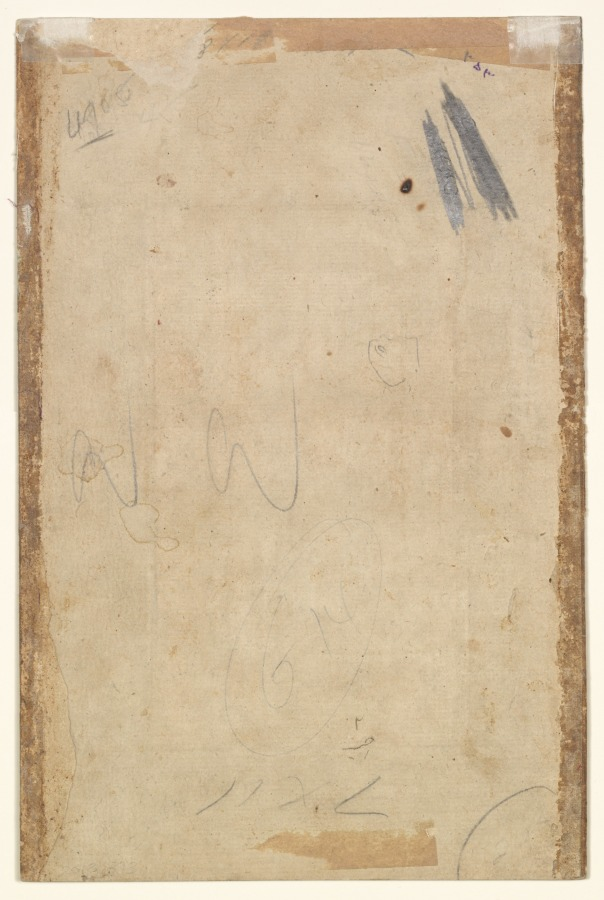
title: Portrait of Suraj Singh Rathor, Raja of Marwar and Maternal Uncle of Shah Jahan: A Page from the Prince Khurram Album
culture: India, Mughal court, early 17th century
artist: attributed to Bishandas (Indian, active c. 1610–30)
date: c. 1600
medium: Gum tempera and gold on paper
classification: Painting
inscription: inscribed in hand of Shah Jahan in lower inner border: shabihi Raja Suraj-Singh Rathor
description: This true-to-life portrait depicts the maternal uncle of the Mughal prince Khurram (1592-1658), who would later become the emperor Shah Jahan. His clothing and accessories-especially the six-pointed wrapped tunic made of prized translucent muslin-reveal his wealth and status. The artist’s skillful brushwork conveys the varied textures of the fabrics and sensitively renders his patient, somewhat weary expression. Prince Khurram selected this painting for inclusion in an album he assembled in 1612. Suraj Singh was a Hindu prince from Marwar, a Rajput kingdom under the auspices of the Mughal empire. His sister, a Marwar princess, was the third wife of the Mughal emperor Jahangir. Intermarriage with Hindu families is one example of the ecumenism of the early Mughal emperors, who adhered to a liberal form of Islam. Suraj Singh died of natural causes while on a military campaign with Prince Khurram in the Deccan in 1619.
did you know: Emperor Shah Jahan himself wrote the label inscription under the painting.